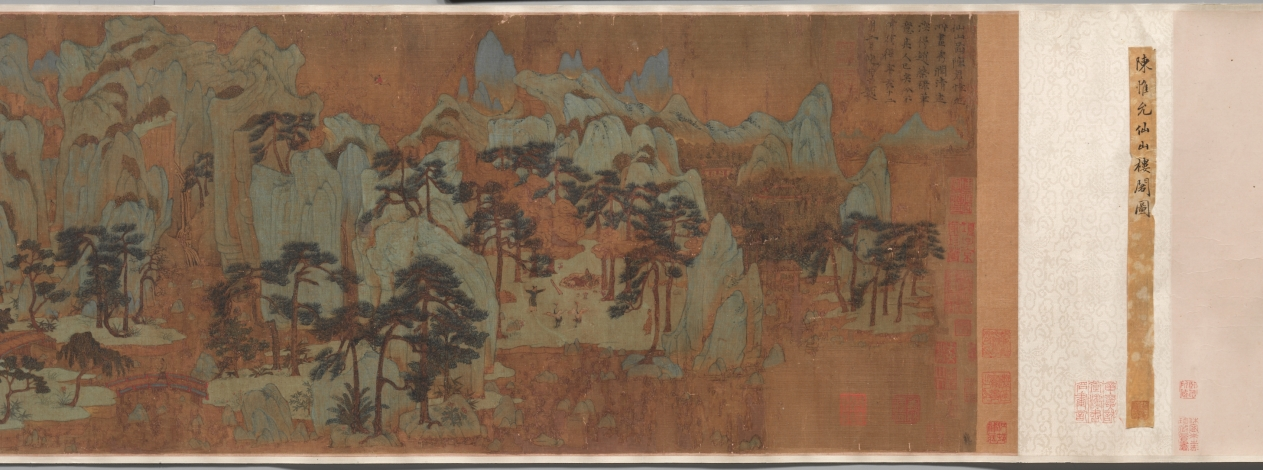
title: Mountains of the Immortals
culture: China, Yuan dynasty (1271-1368)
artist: Chen Ruyan (Chinese, c. 1331–1371)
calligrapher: Ni Zan (Chinese, 1301–1374)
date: 1300–1370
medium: Handscroll; ink and color on silk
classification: Painting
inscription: 1 inscription, 3 colophons, and 37 seals: 1 inscription, dated 1371, by Ni Zan 倪瓚 (1301-1374); 17 seals of Xiang Yuanbian 項元汴 (1525-1590); 4 seals of Chu Chih-ch'ih (late Ming Dynasty); 1 seal of Liang Qingbiao 梁淸標 (1620-1691); 1 seal of Gao Shiqi 高士奇 (1645-1704); 4 seals of Lu Xinyuan 陸心源 (1834-1894); 1 colophon, dated 1908, and 5 seals of Jing Xian 景贒; 1 colophon, dated 1915, by Lung Yu; 1 colophon, dated 1932, and 2 seals of Wu Mei; 3 seals unidentified.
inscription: 仙山圖， 陳君惟允所畫。 秀潤清遠， 深得趙榮祿筆意。 其人已矣， 今不可復得。 辛亥十二月二日倪瓚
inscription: Colophon by Jing Xian 景贒: The preceding Land of Immortals is an authentic work of the Yuan master, Chen Weiyun 陳惟允. According to the Yu yi bian 寓意編 by Du Mu 都穆of the Ming Dynasty, the painting was seen at the home of Chen Mengxian 陳孟賢 [c. 1500], a hermit. It is also recorded in Yu yi lu 寓意錄 of the present [Qing] era. The dimensions and the seals are all correct. When the painting went into the possession of Liang Qingbiao 梁淸標, the silk was already quite dilapidated. The only thing now missing, however, is the one line of writing by Xiang Zijing 項子京 [Xiang Yuanbian 項元汴] who records the original price he paid, being fifteen taels of silver. This must have been cut off by the dealer, which nevertheless did no harm to a masterpiece such as this. Jing Xian recorded this in the second month of the maoshen year [1908].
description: The landscape in deep green tones offers a view into a secluded mountain valley, populated by ancient figures surrounded by deer and cranes, all under high pine trees. A red-robed immortal in the air steers his crane toward the paradise land. This idyllic scene was presumably created amid the tumultuous transition from the Yuan to the Ming dynasty. Chen from Suzhou supported major rebel leaders, first Zhang Shicheng (1321–1367) with his base in Suzhou and then his rival Zhu Yuanzhang in Nanjing, after the latter had established the Ming dynasty. Chen was executed in 1371.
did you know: Such blue and green landscapes often evoke nostalgia for the idealized ancient times.